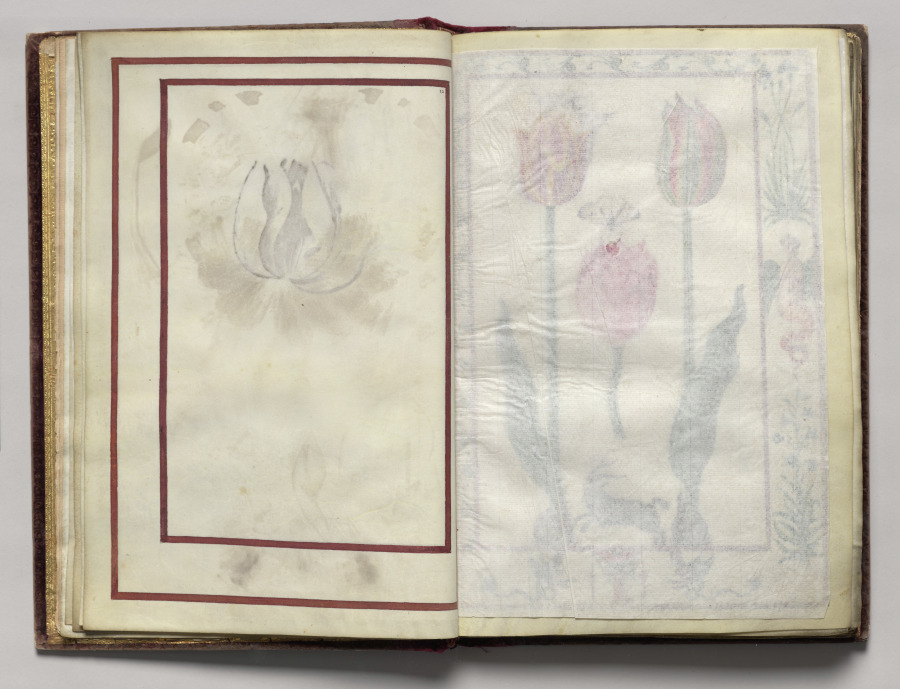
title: Border, folio 6 (verso), from Florilegium (A Book of Flower Studies)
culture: France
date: 1608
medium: watercolor, ink, silver and gold over occasional traces of pencil, on vellum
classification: Bound Volume